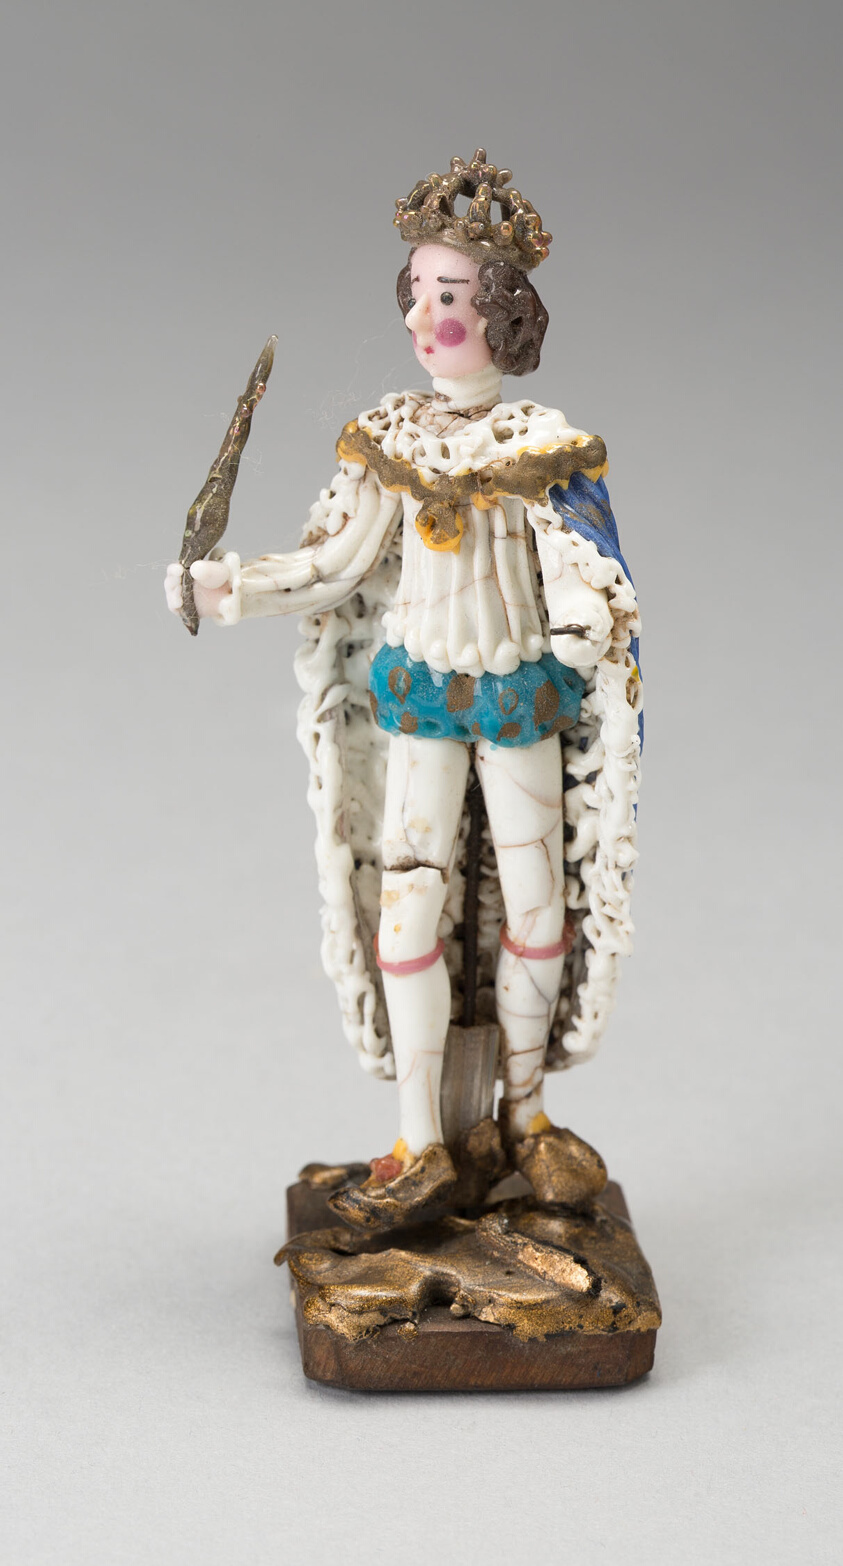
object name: Glass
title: King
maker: Nevers, France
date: 18th century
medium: Glass; lampwork (verre de Nevers), metal armature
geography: France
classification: glass; miniature; decorative object/ornament; european decorative arts